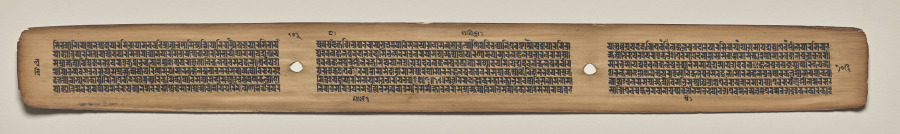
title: Text, Folio 103 (verso), from a Manuscript of the Perfection of Wisdom in Eight Thousand Lines (Ashtasahasrika Prajnaparamita-sutra)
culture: Eastern India, Bihar, Vikramashila Monastery. Painting: Nepal, Kathmandu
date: Sunday, September 14, 1119 (year 239 of the Newar Samvat in the month of Ashvina)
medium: gum tempera and ink on palm leaves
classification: Painting